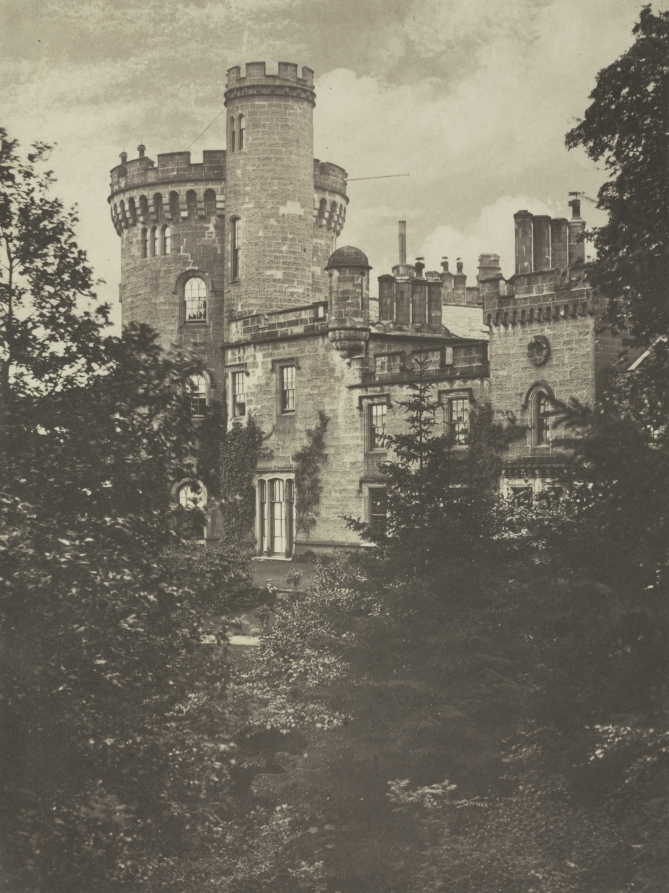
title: View of Tullichewan Castle, Glasgow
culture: England, 19th century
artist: James Campbell of Strachathro (British, 1790–1876)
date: c. 1855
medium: salted paper print from wet collodion negative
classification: Photograph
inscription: Written in pencil on recto of mount: "L1090"